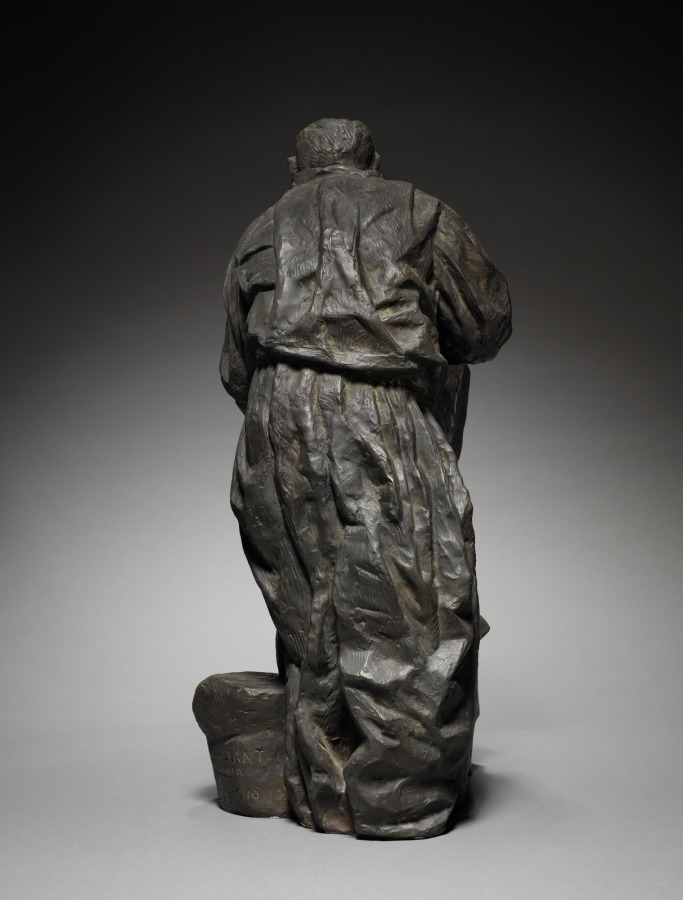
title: Rodin Working on "The Gates of Hell"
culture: France, 20th century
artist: Emile Antoine Bourdelle (French, 1861–1929)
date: 1910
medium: bronze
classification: Sculpture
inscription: Inscribed on side: "Rodin travaillant a la porte de l'enfer"; "Emile-Antoine Bourdelle, 1910"